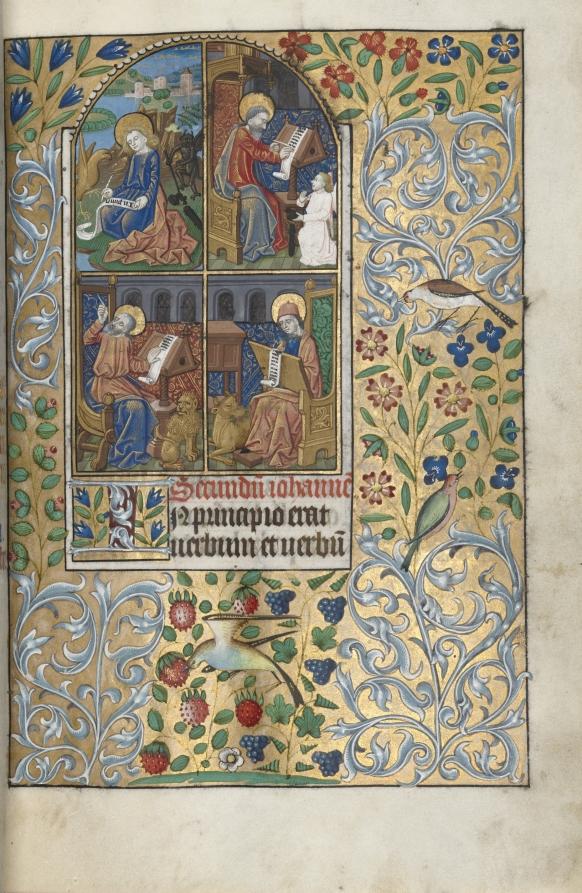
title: Book of Hours (Use of Rouen): fol. 13r, The Four Evangelists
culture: France, Rouen, 15th century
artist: Master of the Geneva Latini (French, active Rouen, 1460–80)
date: c. 1470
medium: ink, tempera, and gold on vellum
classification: Bound Volume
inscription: Secundm iohanne In principio erat Verbum et Verbu…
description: A regular feature in books of hours after the 1400s is gospel lessons. These texts come from the Bible and are what make a book of hours sacred. In lavish editions, images of the evangelists believed to have written the Gospels—Mathew, Mark, Luke, and John—introduce the texts. The gospel lessons describe God’s divine plan beginning with the Annunciation, or announcement to the Virgin Mary that she would conceive a son by the power of the Holy Spirit. They continue with the story of Christ’s birth and the visitation of the three magi, or kings. The lessons end with the resurrection of Christ after the Crucifixion and his ascension into heaven. At the time of use, households did not own Bibles, making the inclusion of these texts, which had once been solely the provision of the ordained, precious. The rubric, or red text, of the recto (right) page says Secundum Iohanne, or Gospel of John, indicating the gospel lessons’ beginning. The page is enhanced with an image of the four evangelists writing the Gospels. At top left is John, with an eagle, writing while the devil tries to thwart him by stealing his inkwell. Beside this is Matthew, at a traditional desk, an angel kneeling nearby. In the text row are Mark with a lion and Luke with an ox.